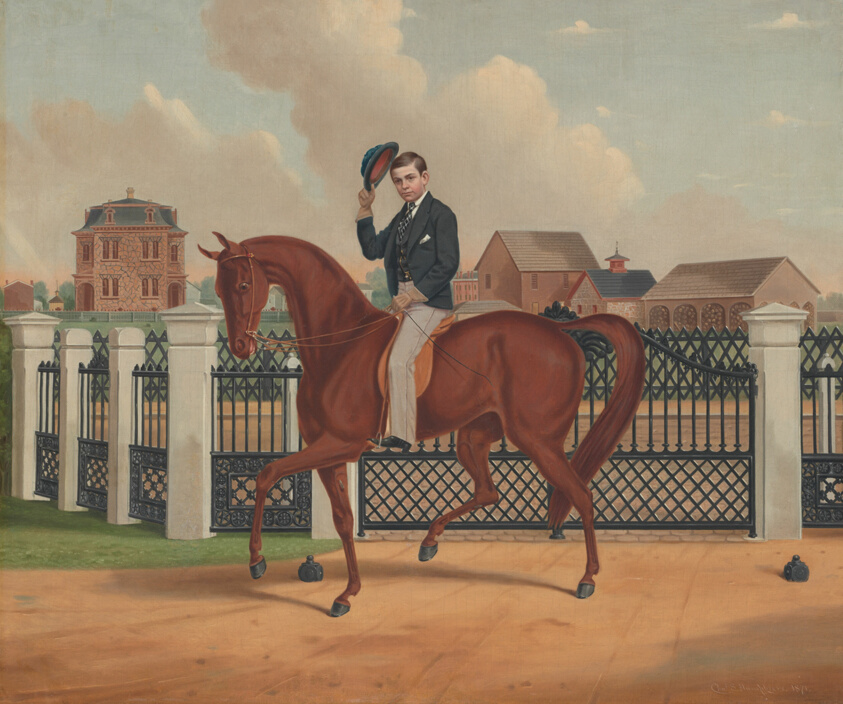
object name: Painting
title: George Franklin Archer and the Archer Residence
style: Folk Art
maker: Charles Spencer Humphreys (American, 1818–1880)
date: 1871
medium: Oil on canvas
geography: New Jersey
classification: painting; american arts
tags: animals